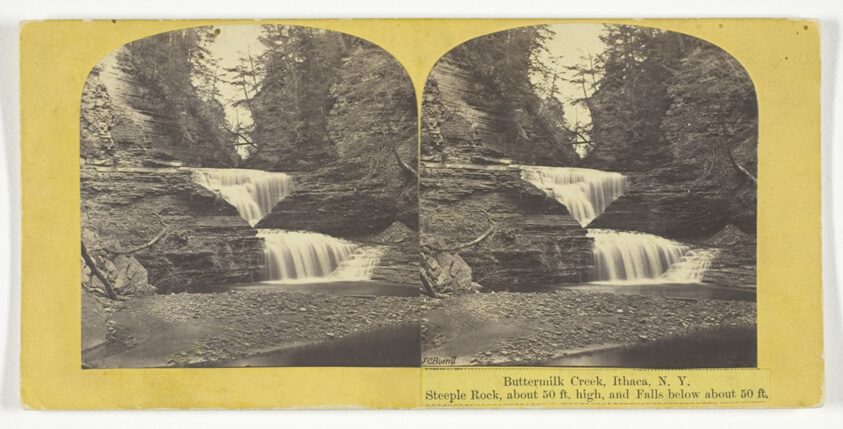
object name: Photograph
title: Buttermilk Creek, Ithaca, N.Y. Steeple Rock, about 50 ft. high, and Falls below about 50 ft.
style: 19th century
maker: J. C. Burritt; American, active 1860s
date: 1860/65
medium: Albumen print, stereo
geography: Ithaca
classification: photography; photograph; albumen silver print; stereograph (albumen)